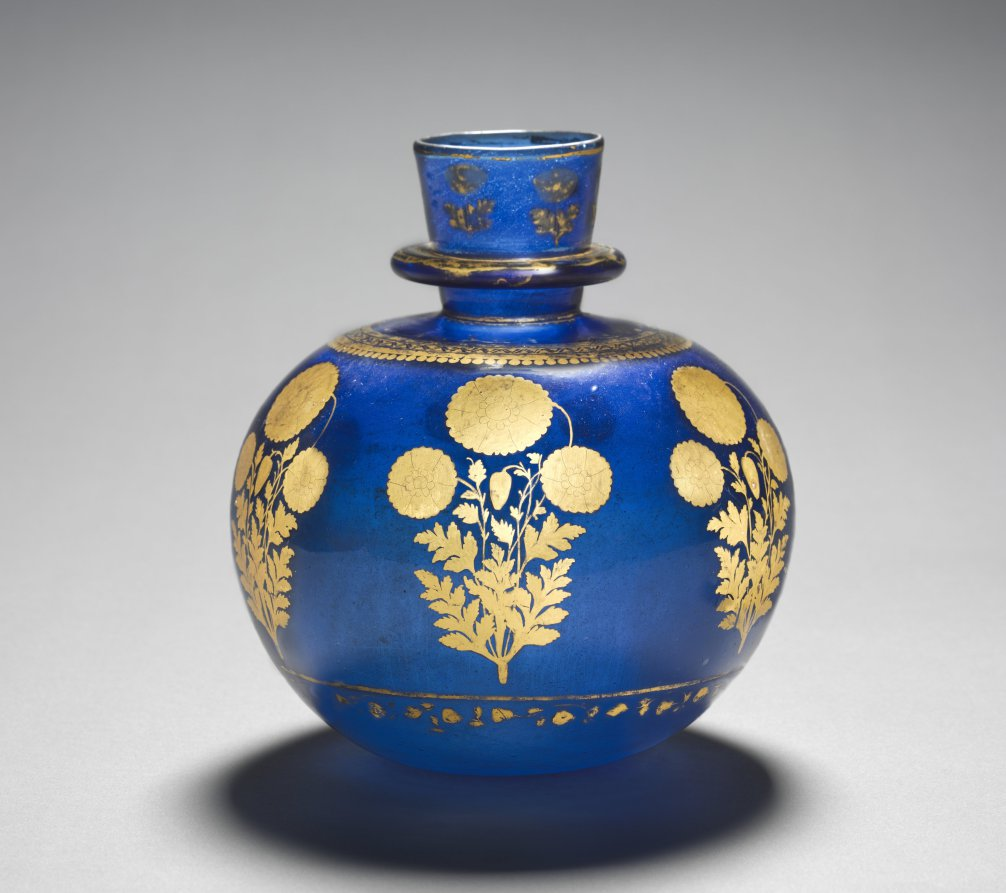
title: Hookah Base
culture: Mughal India, possibly Lucknow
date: c. 1750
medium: gold on blue glass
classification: Glass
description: Smoking tobacco was introduced to the Mughal court from Iran in the very early 1600s and soon became popular. This base formed part of a hookah, or water pipe, which consisted of a base that held water—sometimes perfumed with herbs or fresh fruit—a detachable bowl to hold tobacco, and a long tube. Early hookahs used existing vessels for bases, including coconut shells. By the late 1600s or early 1700s, richly decorated pieces like this were produced. The striking gold poppies on a cobalt blue background might indicate that opium was used in the hookah.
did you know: The neckpiece was made separately and attached to the blown glass bowl.